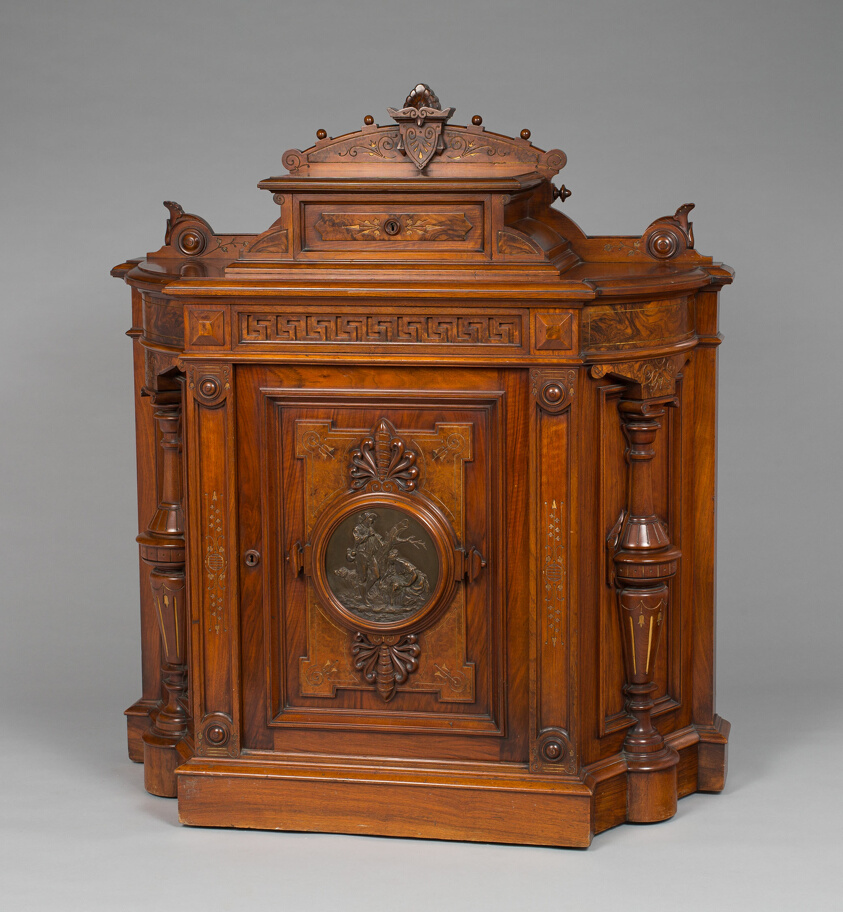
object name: Furniture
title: Cabinet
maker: George Croome (American, 1807–1879)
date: 1875–77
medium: Mahogany, rosewood, maple, pine, and bronze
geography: Boston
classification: case furniture; furniture; american decorative arts; american arts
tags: furniture